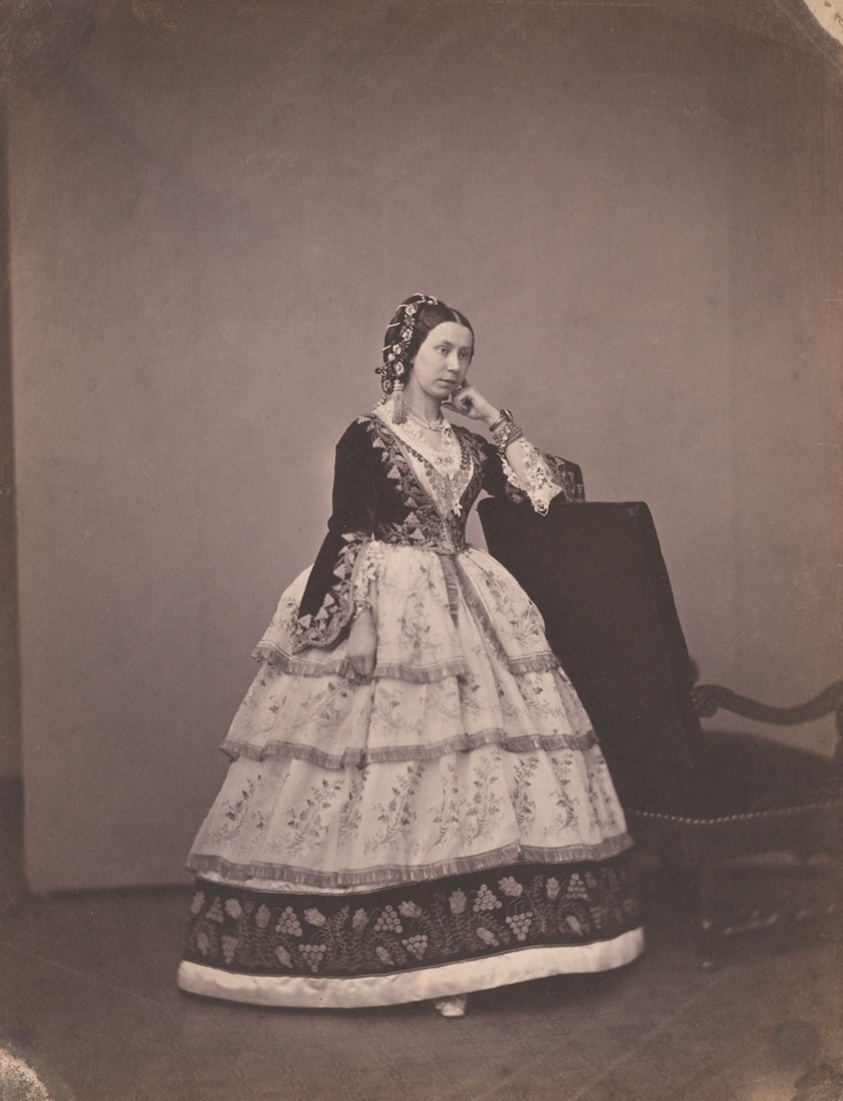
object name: Photograph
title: Madame Carrelle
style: 19th century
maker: Pierre-Louis Pierson, French, 1822-1913; Louis Frédéric Mayer, French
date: 1856/57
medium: Salted paper print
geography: France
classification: salted paper print; photographic process; photography; photograph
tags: Paris, portraits: female subject, photography, portraits